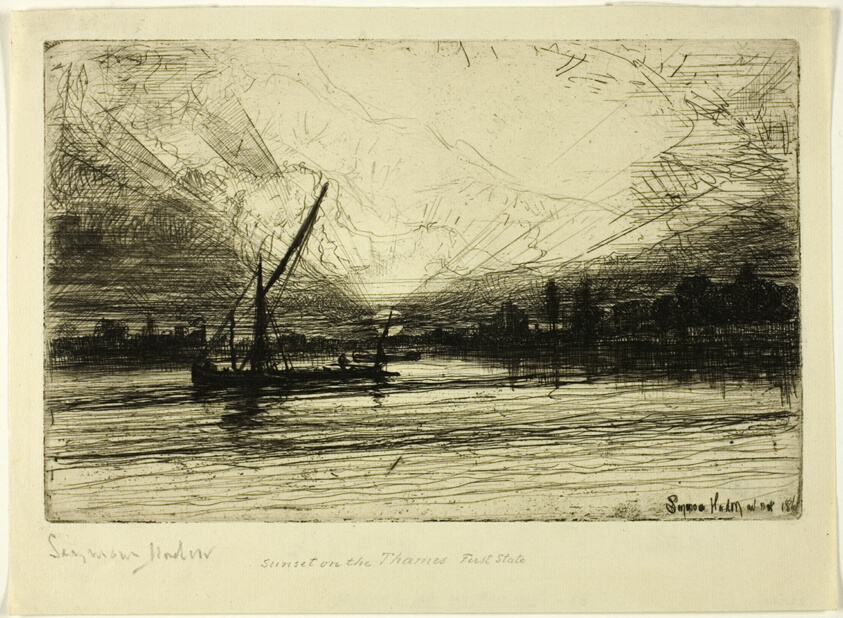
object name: Print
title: Sunset on the Thames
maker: Francis Seymour Haden (English, 1818-1910)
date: c. 1865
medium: Etching and drypoint on ivory laid paper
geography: England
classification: etching; print; prints and drawing